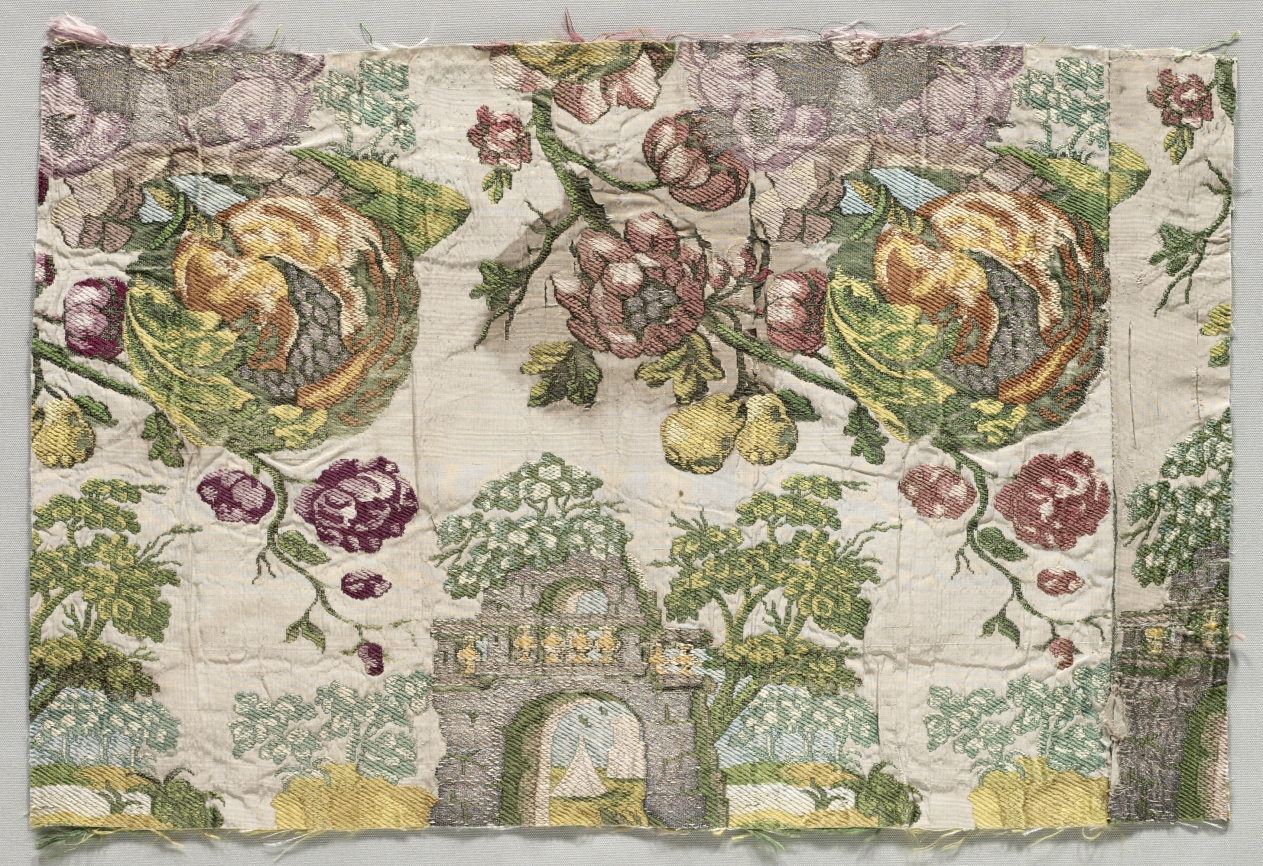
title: Brocaded Textile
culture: Italy, 18th century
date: 1700s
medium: plain cloth, brocaded (?); silk and metal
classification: Textile